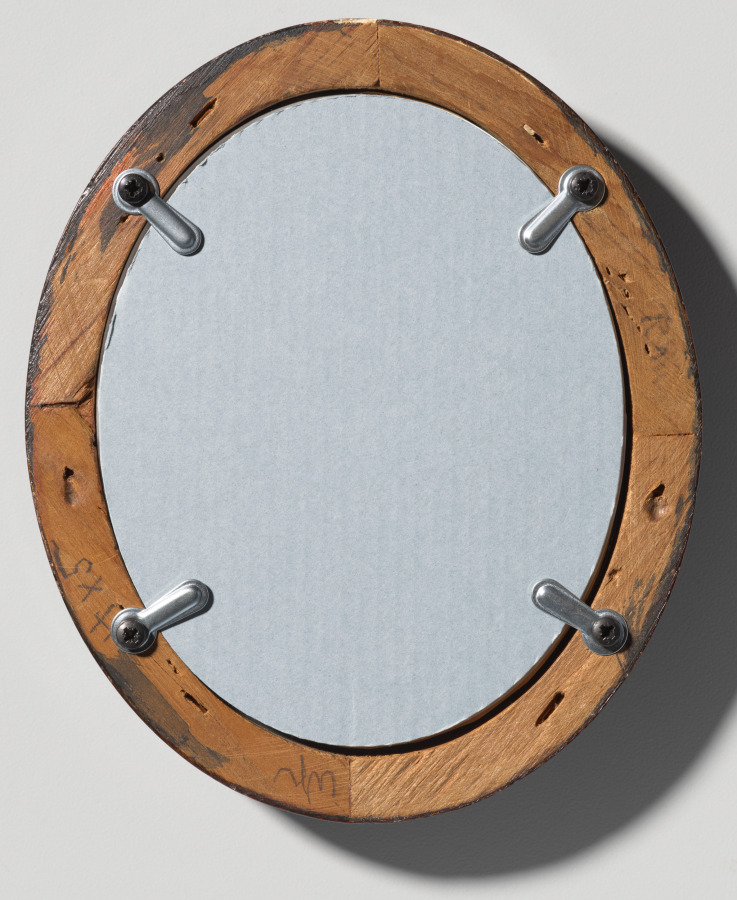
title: Clara L. White as a Child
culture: America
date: 1885–86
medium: Matte collodion with hand-applied crayon and paint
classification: Photograph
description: Virtuoso painting is possible on this very intimate scale, yielding an image that lies on the border between the worlds of photography and the painted miniature. Because the subject’s name and life dates were written on the back, we have found out that White (1883–1987), who never married, spent her life in the vicinity of Winchester, Connecticut, and worked at least into her late sixties as a stenographer and later, secretary to the principal of a school.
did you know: There is a black-and-white photograph underneath all the paint here.